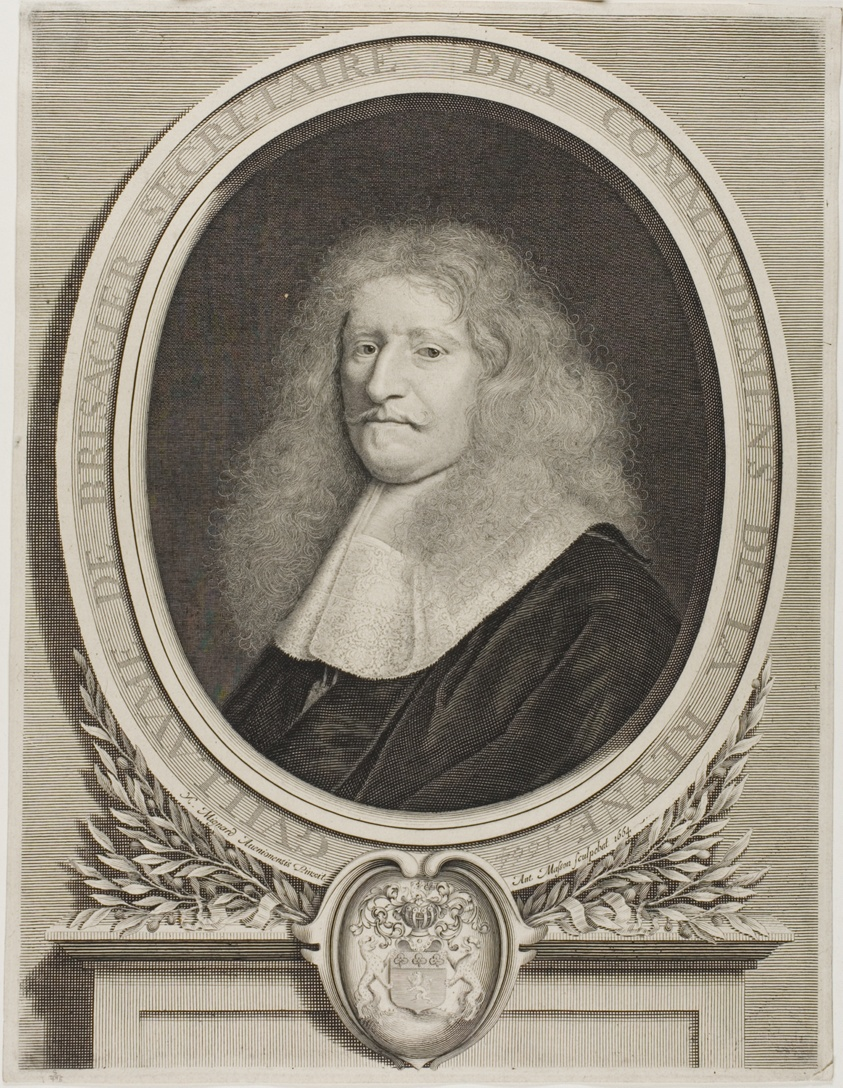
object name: Print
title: Guillaume de Brisacier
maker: Antoine Masson (French, 1636-1700); after Nicolas Mignard (French, 1606-1668)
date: 1664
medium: Engraving on paper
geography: France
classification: engraving; print; prints and drawing